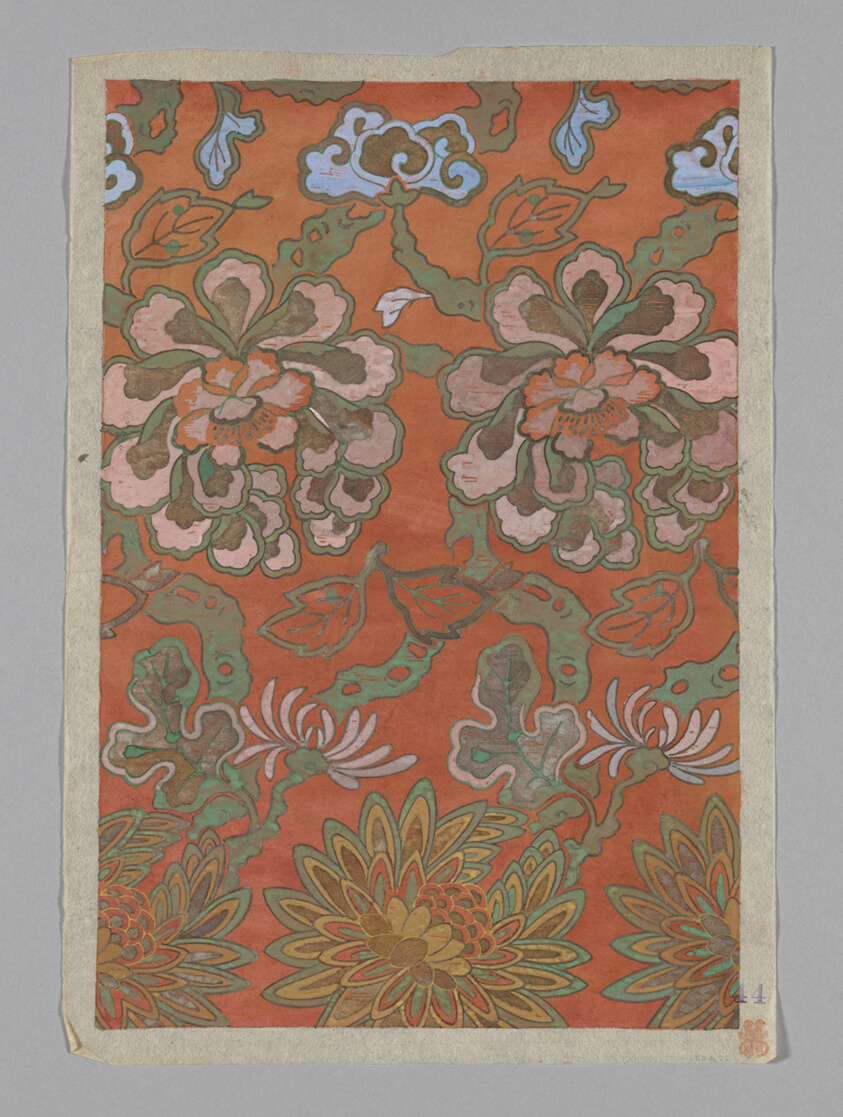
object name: Drawing and Watercolor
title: Design on Paper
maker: Japan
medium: Paper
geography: Japan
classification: textile; accessory - paper design; watercolor; paper